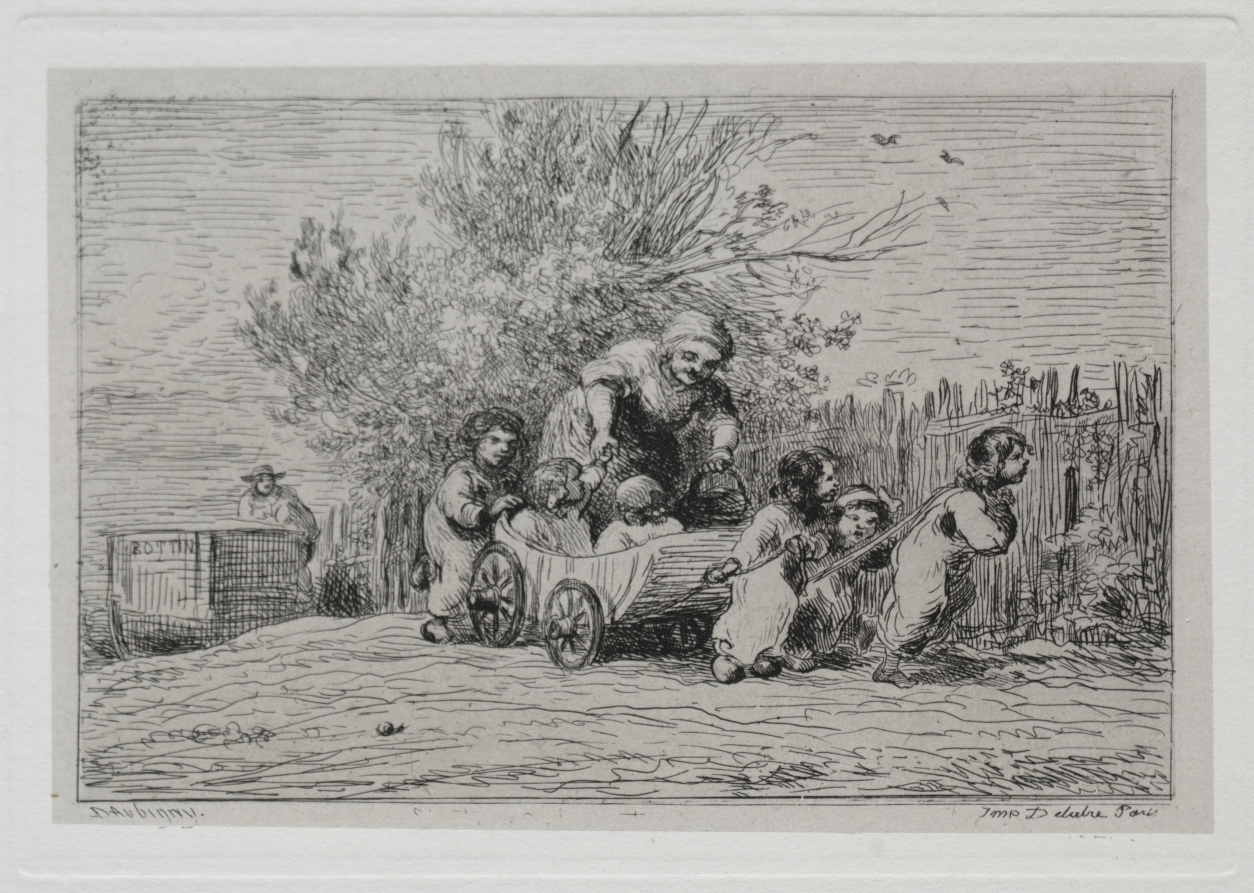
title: The Boat Trip: Heritage of the Cart (The Children with the Cart)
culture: France, 19th century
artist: Charles François Daubigny (French, 1817–1878)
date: 1861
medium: etching with chine collé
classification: Portfolio